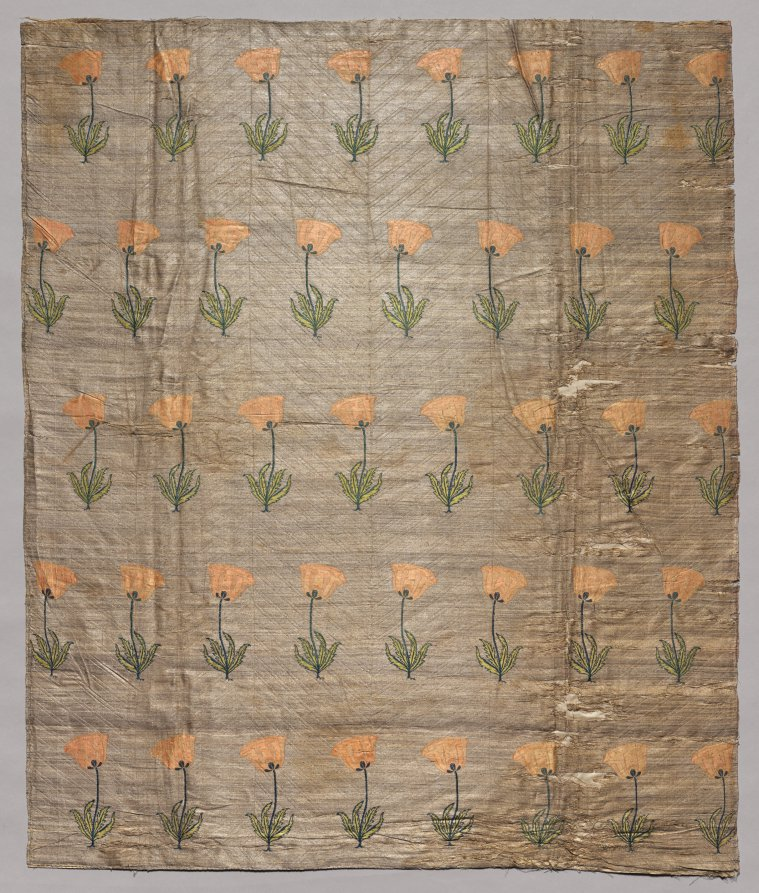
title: Textile with field of poppies on a golden ground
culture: Iran, Safavid period (1501–1722)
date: 1600–1750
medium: silk and gilt-metal thread: twill weave with supplementary weft, stamped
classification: Textile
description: Trade in textiles flourished between India and Iran. Courtly consumers from the neighboring Mughal and Safavid dynasties admired the products of both regions. The subtle chevrons set off rows of poppies that sway in alternating directions, lending a gentle liveliness to the overall pattern. Peach and green silk threads interlace to create each poppy in a technique that uses discontinuous wefts and allows for a smooth surface finish to this lightweight textile.